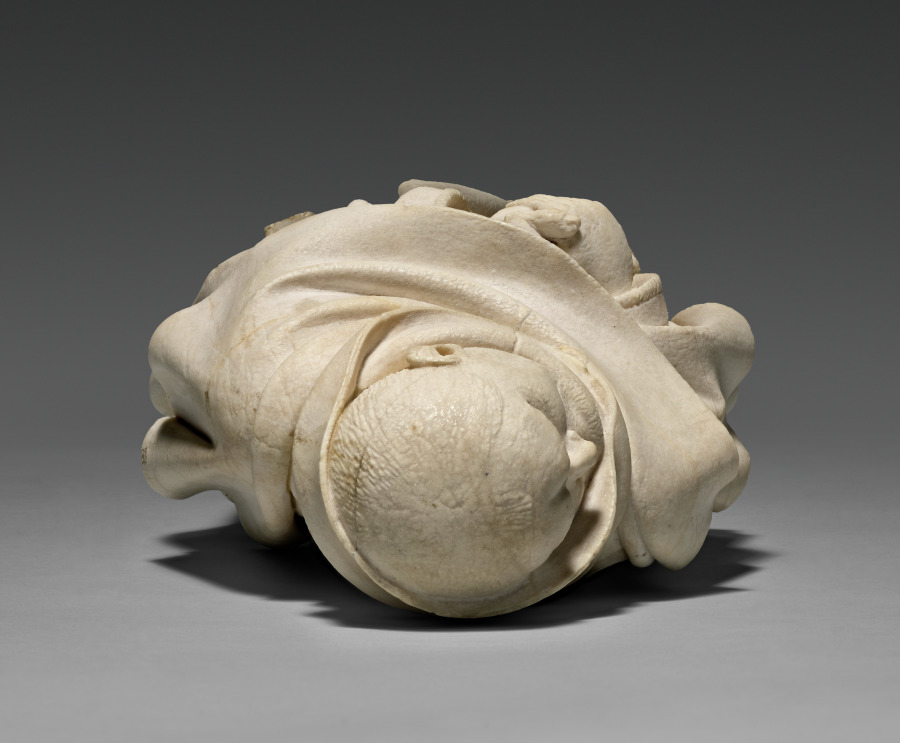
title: Mourner from the Tomb of Philip the Bold, Duke of Burgundy (1364–1404)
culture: Netherlands, active Dijon, 15th century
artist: Claus de Werve (Netherlandish, 1380–1439)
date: 1404–10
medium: vizille alabaster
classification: Sculpture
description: This figure comes from the tomb of Duke Philip the Bold from the church of Champmol near Dijon (Burgundy, France). Philip, who founded the monastery and designated it as his burial place, hired the best artists, many of whom came from the Netherlands. While the commission was given in 1381, the work was not completed until 1410, six years after the duke’s death. This mourner is unusual for the time because it is not carved as a static low relief on the pedestal of the tomb but interact with the viewers and their fellow procession members. The lifelike quality of the figure is due in large part to the alabaster. Its softness allowed artists to carve details into the material, and the transparent, milky white stone could also be polished to a high gloss.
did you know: The use of alabaster in the late Middle Ages began in the 1300s with court art in the circles of French kings, especially in the field of funerary sculpture.